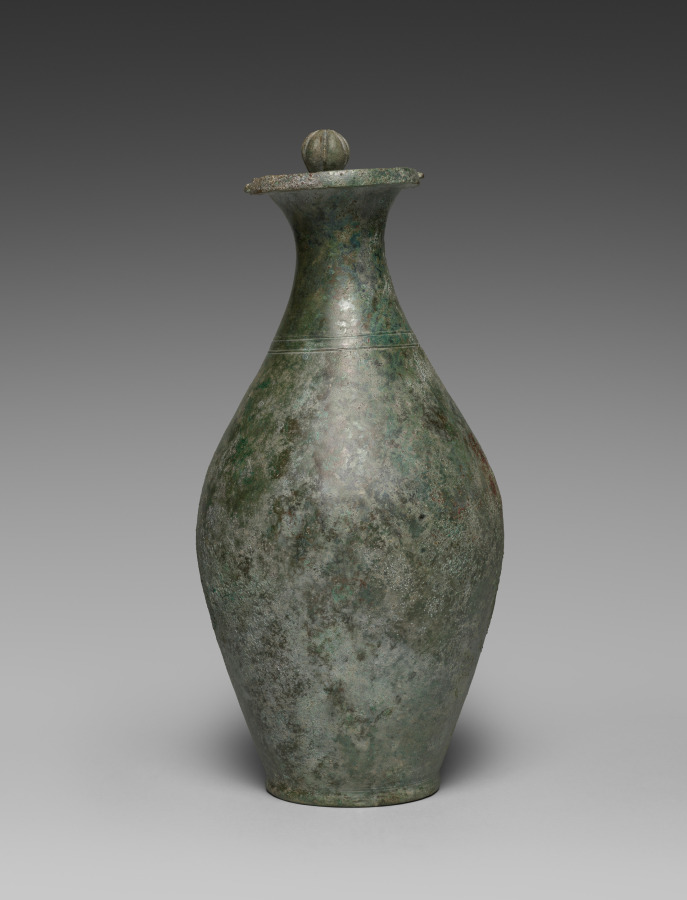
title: Olpe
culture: Italy, Roman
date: 1–100 CE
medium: cast bronze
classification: Metalwork